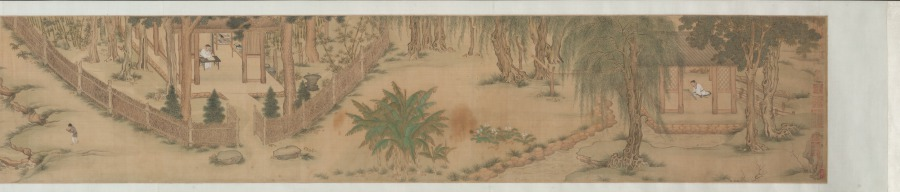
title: Garden for Solitary Enjoyment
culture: China, Ming dynasty (1368–1644)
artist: Qiu Ying (Chinese, 1494–1552)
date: 1515–52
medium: Handscroll; ink and light color on silk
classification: Painting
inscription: Accompanying text of an essay together with seven poems of Sima Guang (1019–1086) and one poem of Su Shi (1037–1101) written by Wen Zhengming (1470–1559) in 1558.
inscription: 2 colophons and 82 seals: 4 seals of Wen Zhengming 文徵明 (1470–1559); 59 seals of Xiang Yuanbian 項元汴 (1525–1590); 1 colophon, dated 1644, and 7 seals of Xiang Yukui 項禹揆 (c. late 1500s–1659); 1 colophon, dated 1880, and 2 seals of Weng Tonghe 翁同龢 (1830–1904); 2 seals of Ch'eng Chen-i (19th c.); 1 seal of Han Ch'ung (19th c.); 4 seals of Wan-go H. C. Weng 翁萬戈 (1918–2020); 3 seals unidentified.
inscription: Colophon by Xiang Yukui 項禹揆 (c. late 1500s–1659): The painting of The Garden for Self-enjoyment on the right by Shih-chou, Mr. Qiu [Qiu Ying] is in the style of Li Lung-mien. Its mood is peaceful, as if meeting the ancient gentlemen face to face among the brushes and silk; it lifts one above the sordid bustle of life. Formerly, my late father handed me this scroll which had only the painting without the written essay. I considered asking a good calligrapher to write the essay to add to it but was afraid that the quality of the writing would not match the painting. Several years later, I saw at a friend's house this essay and poems (of Ssu-ma Kuang] written by Hengshan [Wen Zhengming], once owned by my grandfather; so I spared no expense to obtain it. I rejoiced at this and said: "The divine swords are finally united. How things are pre-destined!" Now my friend Chang Kung-chao's technique for mounting [painting and calligraphy] is excellent. Therefore by daring to take them out and join them together, I can preserve this beautiful story of singular reunion. Xiang Yukui recorded at Hai-yeh-t'ang [hall] two days before New Year's Eve in the jiasheng year of the Chongzhen era [1644]. trans. LYSL/HK/WKH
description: Garden of Solitary Enjoyment refers to a site built in 1073 by the statesman Sima Guang (1019–1086) after he had retired to Luoyang, Henan province. Every spring, visitors would flock to his garden. Each of its seven structures references a historic figure. Sima wrote: I channel streams [like Du Mu], to water flowers [like Bai Juyi], or trim bamboo [like Wang Huizhi]. . . . I know of no joy between heaven and earth that could take its place. Qiu Ying’s painting, created after an 11th-century version of the same theme, must have appealed to garden owners of the Ming dynasty, since it became the template for numerous Suzhou workshop copies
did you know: Sima Guang completed his monumental survey of Chinese history, Zizhi tongjian, in the garden depicted in this painting.